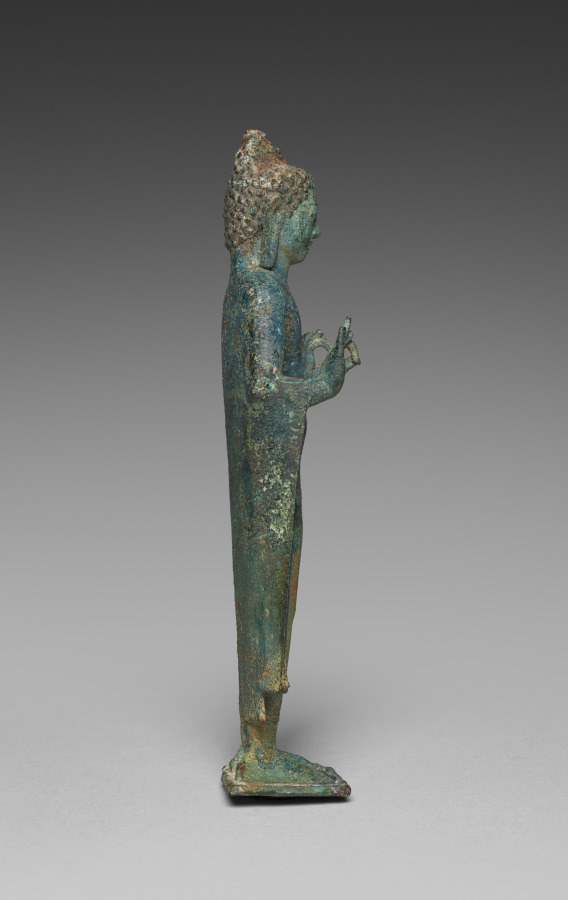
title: Buddha with Hands in Gesture of Teaching, Vitarka Mudra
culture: Thailand, Mon-Dvaravati period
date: 600s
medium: bronze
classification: Sculpture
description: Made during the early phase of Buddhist art production in mainland Southeast Asia, this Buddha wears a plain robe that indicates the artist's awareness of images made at the workshops of Sarnath, on the Ganges River in India. The hem of the lower garment, worn under the monk's robe, elegantly crosses the ankles, and the subtle line at the waist shows where it is secured.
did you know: Bronze sculptures in Thailand were made by sculpting clay around an iron armature; the clay core remains inside.